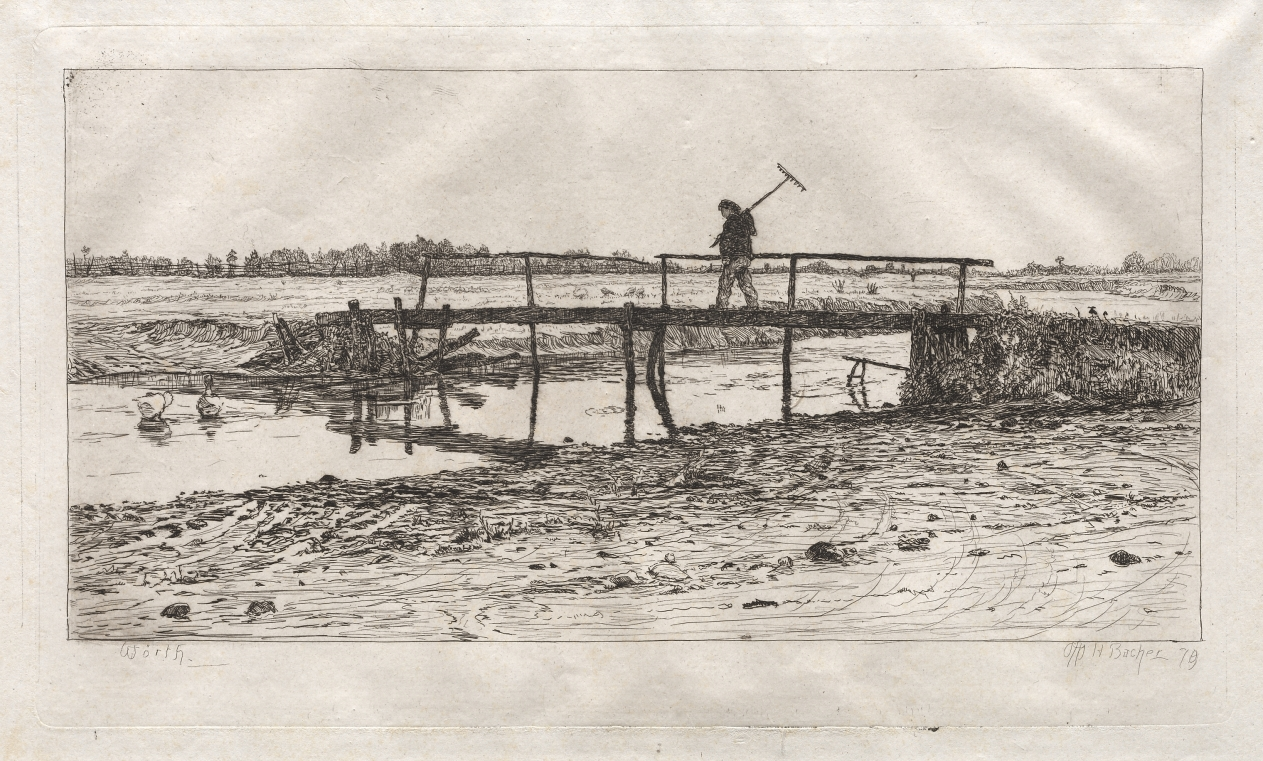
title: Footbridge, Worth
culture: America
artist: Otto H. Bacher (American, 1856–1909)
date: 1879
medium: etching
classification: Print